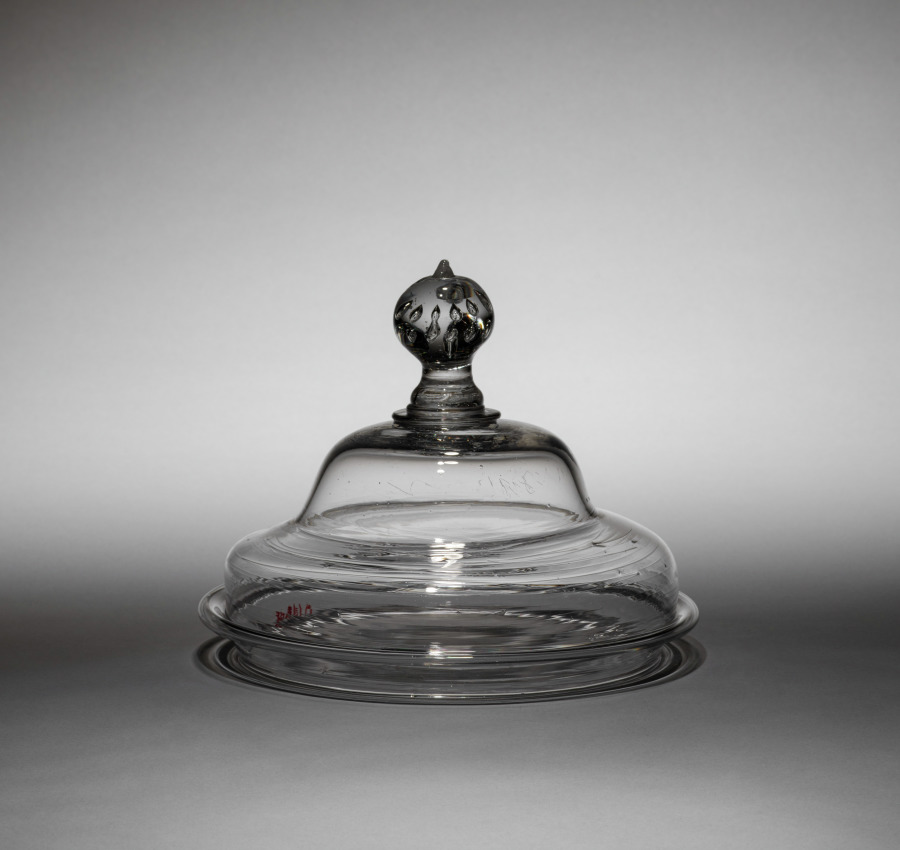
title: Flip Cup (lid)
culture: America, early 19th century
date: c. 1800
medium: glass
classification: Glass